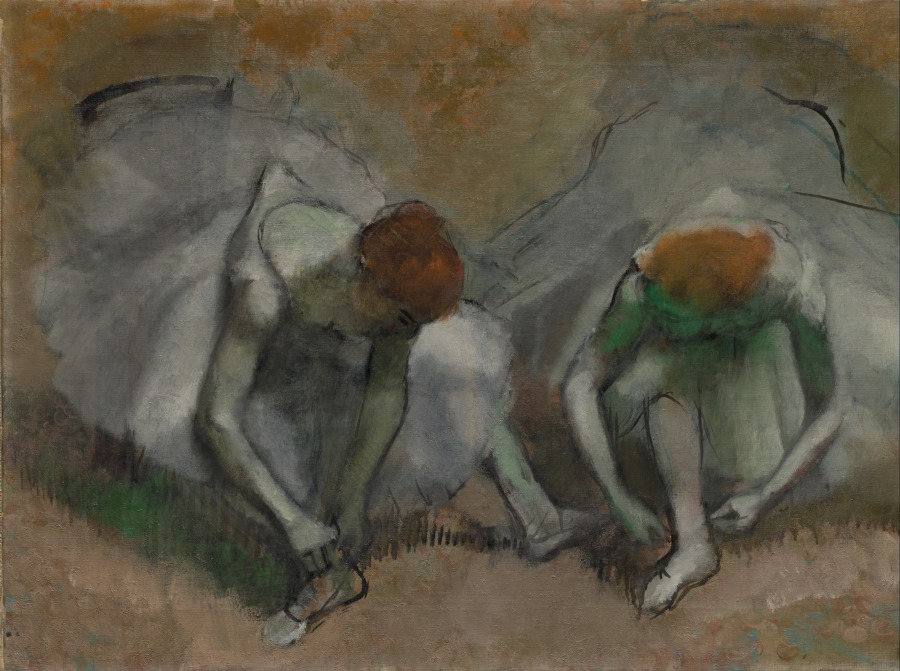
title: Frieze of Dancers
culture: France, 19th century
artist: Edgar Degas (French, 1834–1917)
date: c. 1895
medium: oil on fabric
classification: Painting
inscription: Signed in lower right: Degas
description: This painting may depict a single dancer seen from four different viewpoints. The young woman is placed in an undefined setting, surrounded by mere wisps of color, applied so spontaneously that the paint ran and dripped. Degas even added the circles in the foreground with his thumb. Such audacity, while acceptable in a small sketch, must have shocked the artist's contemporaries when presented on a six-foot canvas. Equally radical is the idea of combining multiple views of a single figure. Degas's unusual presentation may have been inspired by the photographs of Eadweard Muybridge (1830-1904)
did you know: The ballet is a subject Degas returned to again and again over the course of his career. Rather than public performances, he often depicted dancers behind the curtain, practicing, waiting, or, as in this painting, lacing up their shoes.